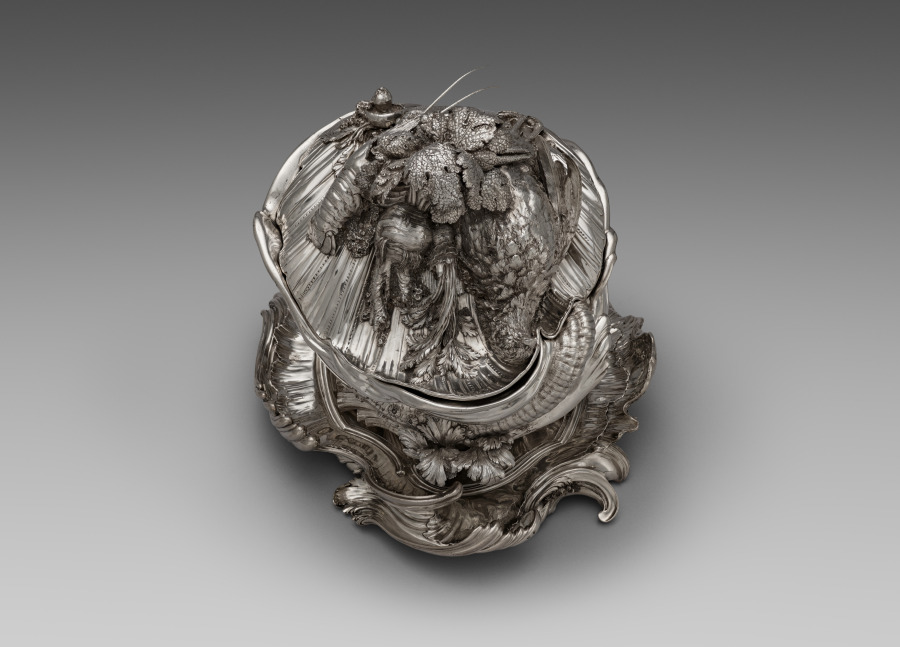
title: Covered Tureen on Stand (Pot-à-oille)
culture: France, Paris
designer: Juste-Aurèle Meissonnier (French, 1695–1750)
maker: Pierre-François Bonnestrenne (French)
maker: Henry Adnet (French, 1745)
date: 1735–38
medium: silver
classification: Silver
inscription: [Maker’s mark of Pierre−François Bonnestrenne, beneath platter; inside tureen (two marks)]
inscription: [Warden's mark for Paris, 1734−1735, beneath platter; inside tureen; inside cover]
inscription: [Charge mark of Hubert Louvet, Paris, 1732-1738, on platter border; beneath platter; beneath tureen; inside cover; inside tureen (two marks)]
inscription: [Discharge mark of Louis Robin mostly used for stamping small work, Paris 1738−1744, on platter border; beneath tureen]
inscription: [Warden's mark for Paris, 1736−1737, on platter border]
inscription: [Possibly British import mark, London, 1925, on platter border]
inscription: [Possibly mark of the British firm Charles & Richard Comyns, on platter border]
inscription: [Discharge of Louis Robin mostly used for stamping gold and silver between 1738 and 1744, beneath tureen; outside cover]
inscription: [Maker’s mark of Henry-Guillaume Adnet, inside cover]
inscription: [Two small undefined marks, inside cover]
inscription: [Under the surface of the platter the engraved signature]: “FAIT-PAR-I-A-MEISSONIER-ARCHITECTTE”; [and the weight] “673=5"; “No. [v] I 50 £ b76Sol”; [and the numbers] “A nº 1”; “A nº2”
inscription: [On tureen lip]: "MEISSONIER"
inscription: [On tureen lip]: “A nº 3”; “A nº2” [in order to place the tureen correctly on the stand]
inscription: [Numbers engraved on the stand, the tureen, and the cover to show how the piece should be assembled]: “A nº 1” [on the base of the tureen; beneath the cover; on the platter], “A nº 2” [on the platter], “A nº 3” [on the exterior rim of the tureen], “A nº4”; “A nº 5” [outside the cover], “A nº 7” [on the border of the platter]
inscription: [Two warden's marks for Paris, 1735-1736, beneath tureen]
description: This tureen exemplifies the French Rococo style, an artistic movement celebrating naturalistic forms that developed in Paris during the early 1700s. In contrast to classical, controlled symmetry, Rococo forms morph, twist, and spill into the space around them. Meissonnier embellished this tureen in a picturesque arrangement of vegetables and creatures, transforming a utilitarian object into a decadent display of wealth and abundance. This masterpiece comes from a set of two tureens commissioned by the English Duke of Kingston during an extended stay in Paris in the 1730s.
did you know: The langoustine, pigeon, and vegetables were cast using real examples giving the silver copies lifelike detail and appearance.